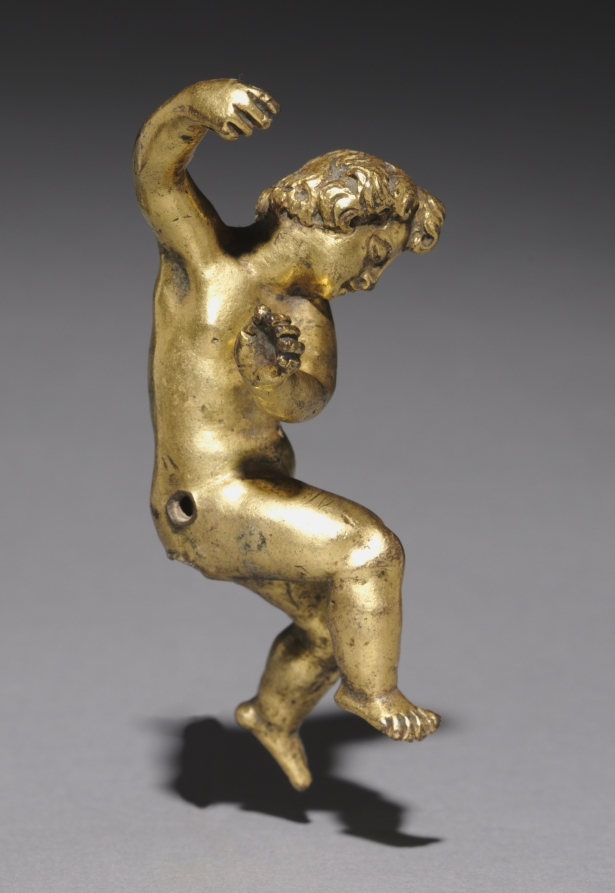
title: Putto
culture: Italy, Rome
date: late 1500s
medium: gilt bronze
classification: Sculpture